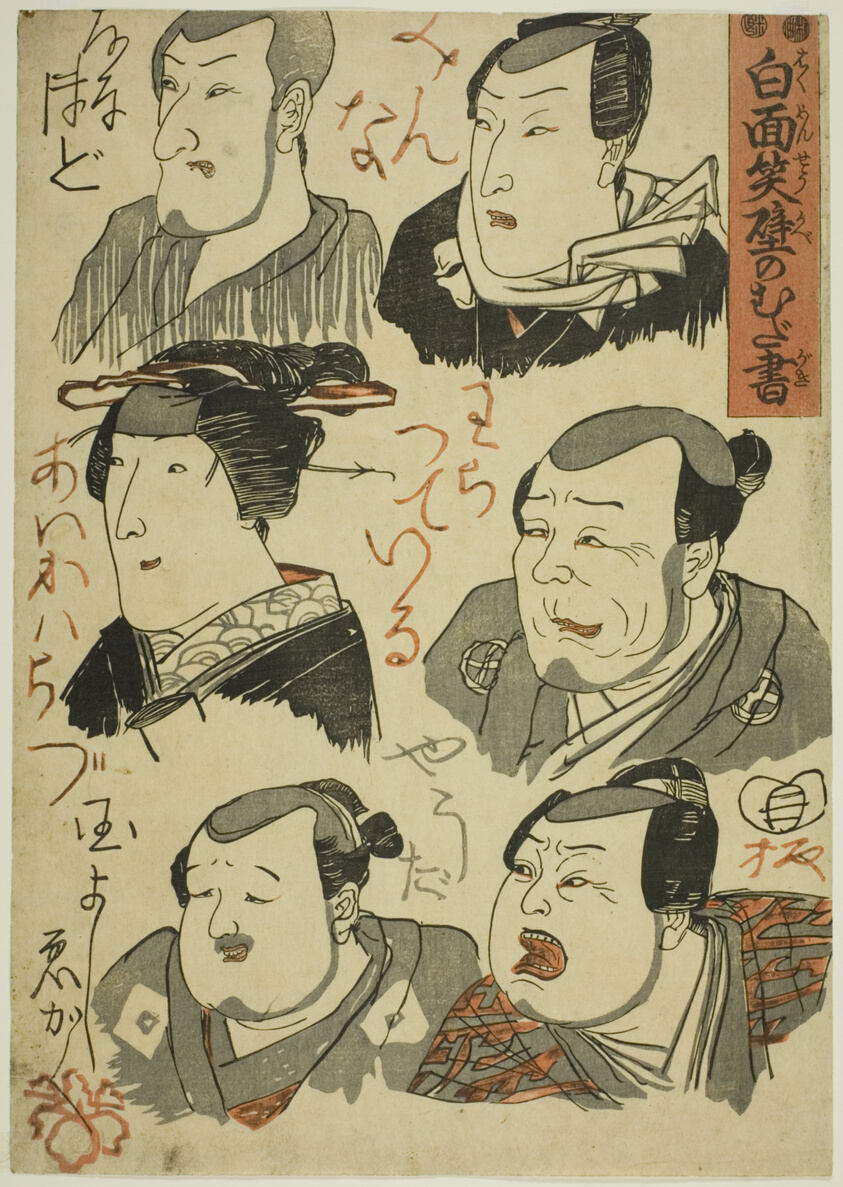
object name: Print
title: Caricatures of Laughing Actors Scribbled on a Wall (Hakumensho kabe no mudagaki)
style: Japanese (culture or style)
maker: Utagawa Kuniyoshi (Japanese, 1797-1861)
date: c. 1848/51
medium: Color woodblock print; right sheet of oban triptych (center: 1975.476, left: 1975.475)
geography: Japan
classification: woodblock print; print; asian art